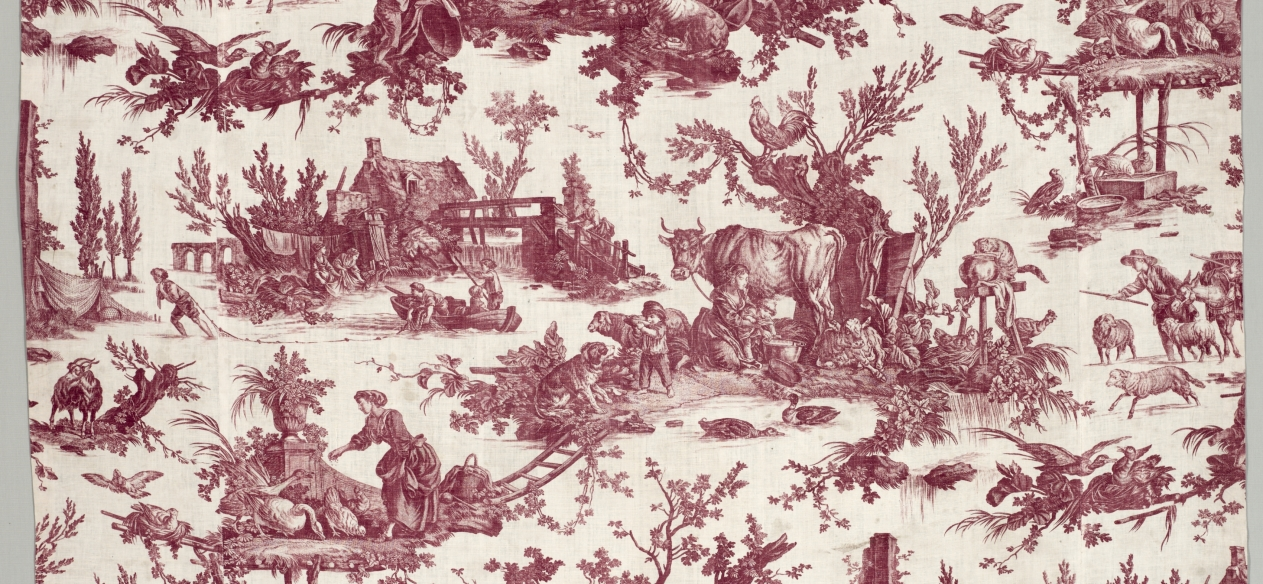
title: Strip of Copperplate Printed Cotton with "Les plaisirs de la ferme" Design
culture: France, 18th century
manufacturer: firm of Christophe Philippe Oberkampf (French, 1738–1815)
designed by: Jean-Baptiste Marie Hüet (French, 1745–1811)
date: 1785–1790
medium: copperplate printed cotton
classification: Textile